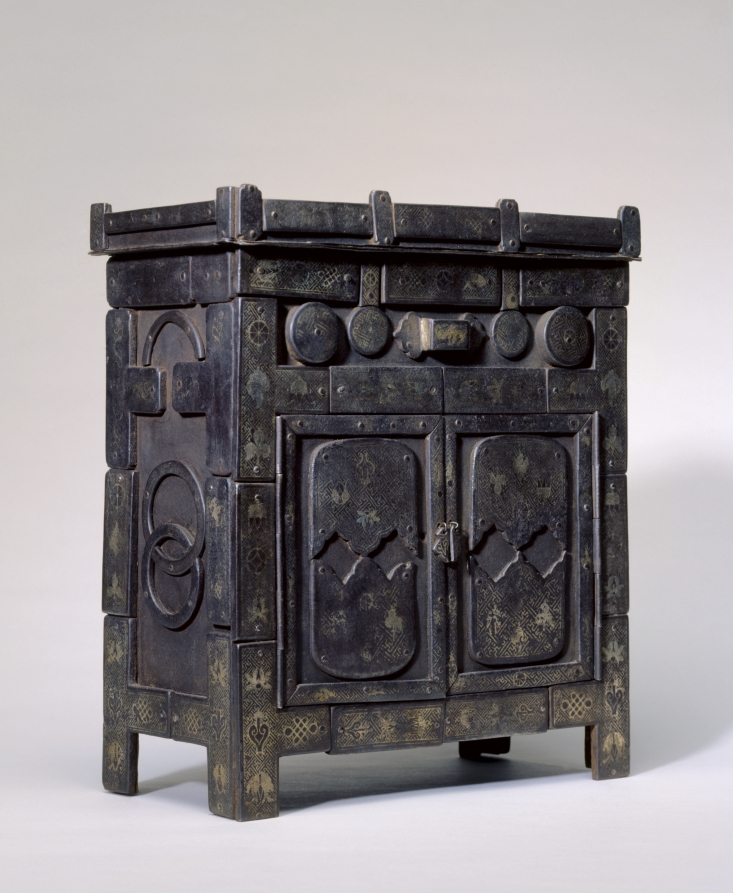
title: Spirit House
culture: Korea, Joseon dynasty (1392–1910)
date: late 1800s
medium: iron inlaid with silver and copper decoration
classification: Metalwork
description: Many homes in premodern Korean society had a memorial shrine for preparing and holding ancestral rites. Placed on the top of a tall chair, this miniature edifice (called the spirit house) served as a temporary residence for visiting ancestral spirits. On the table, a variety of delicacies such as fruits, rice, meat, and wine would be placed to treat those spiritual guests.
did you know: The belief in two types of souls, the spiritual and the corporeal, embodied the core concept of ancestor worship in traditional China and Korea. While the corporeal soul is believed to reside in the tomb, the spiritual soul, in the spirit house, like this example, guards his or her decedents.